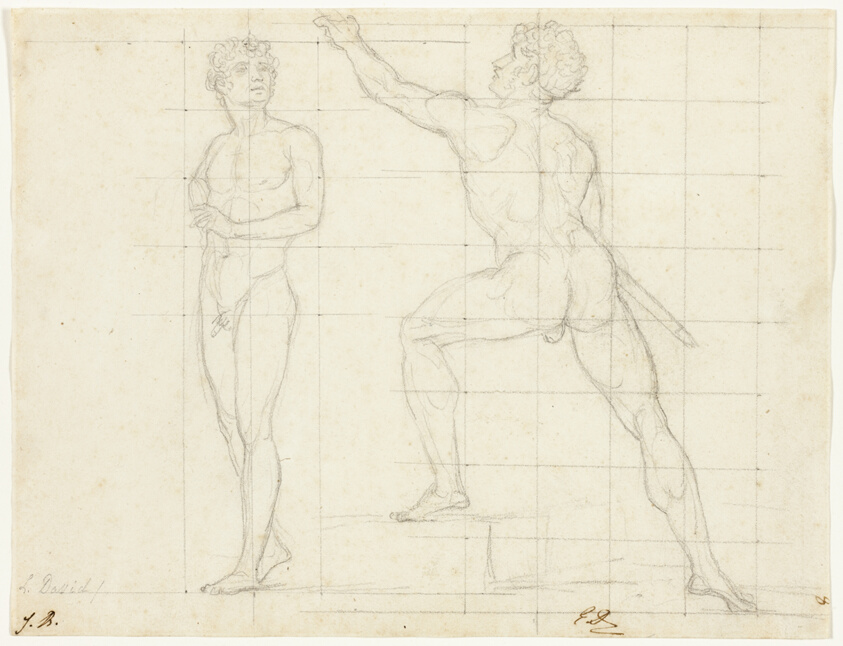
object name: Drawing and Watercolor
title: Study for "The Distribution of the Eagles"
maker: Jacques-Louis David; French, 1748-1825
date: c. 1810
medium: Black chalk on ivory wove paper, squared in graphite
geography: France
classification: graphite; drawings (visual works); prints and drawing